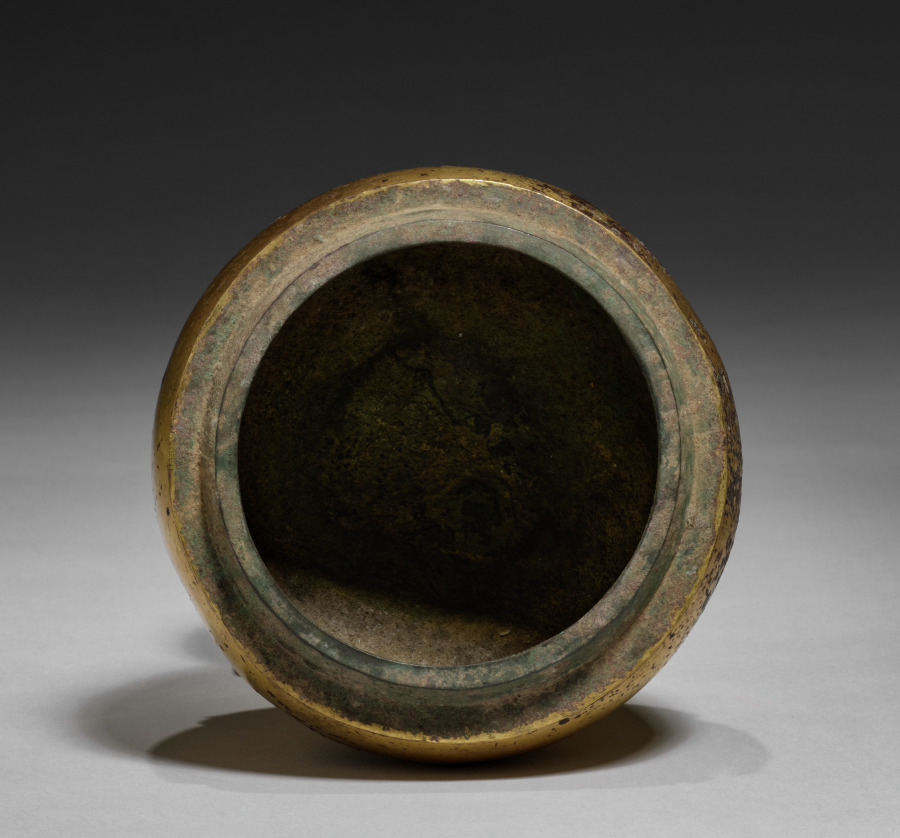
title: Censer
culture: China, Tang dynasty (618-907)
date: early 600s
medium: gilt bronze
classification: Metalwork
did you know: The censor has a lotus-shaped pedestal.